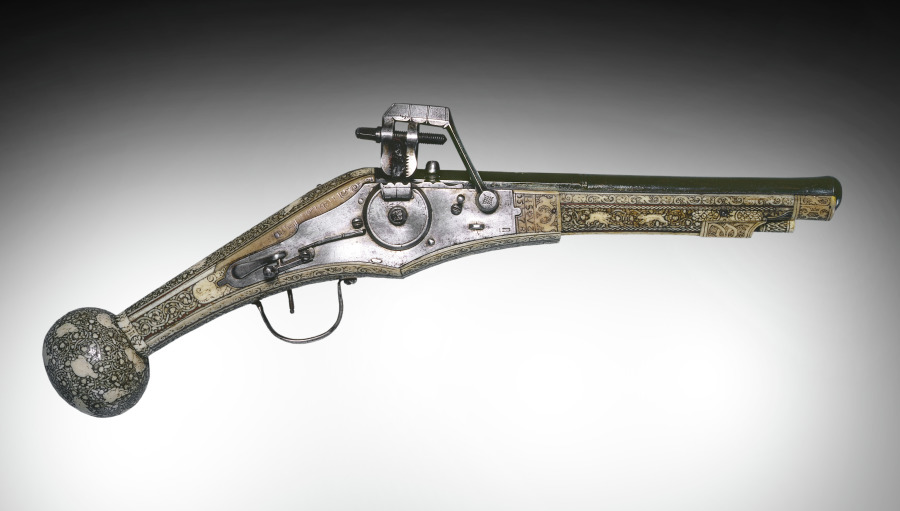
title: Wheel-Lock Hunting Pistol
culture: South Germany, 16th century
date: 1578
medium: steel, walnut stock with engraved stag horn; ball butt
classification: Arms and Armor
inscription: near lock plate: HSVZ 1578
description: The walnut stock of this pistol is inlaid with engraved stag horn in the form of interlacing foliage and arabesques interspersed with putti, birds, and animals—an elegant weapon befitting a noble patron. Since pistols of this type could deliver only one shot and had to be reloaded to fire the next round, they were commonly made in pairs to be worn in leather holsters. The large ball-shaped pommel on the grip made it easier to withdraw the pistol from its holster, and also served as a counterweight to a heavy steel barrel. Additionally, the pommel became a useful weapon when the firing mechanism failed or when close quarters required its use.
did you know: In this time period nobles bred dogs to help them hunt boars; on the barrel of this gun, a boar is shown charging a dog.